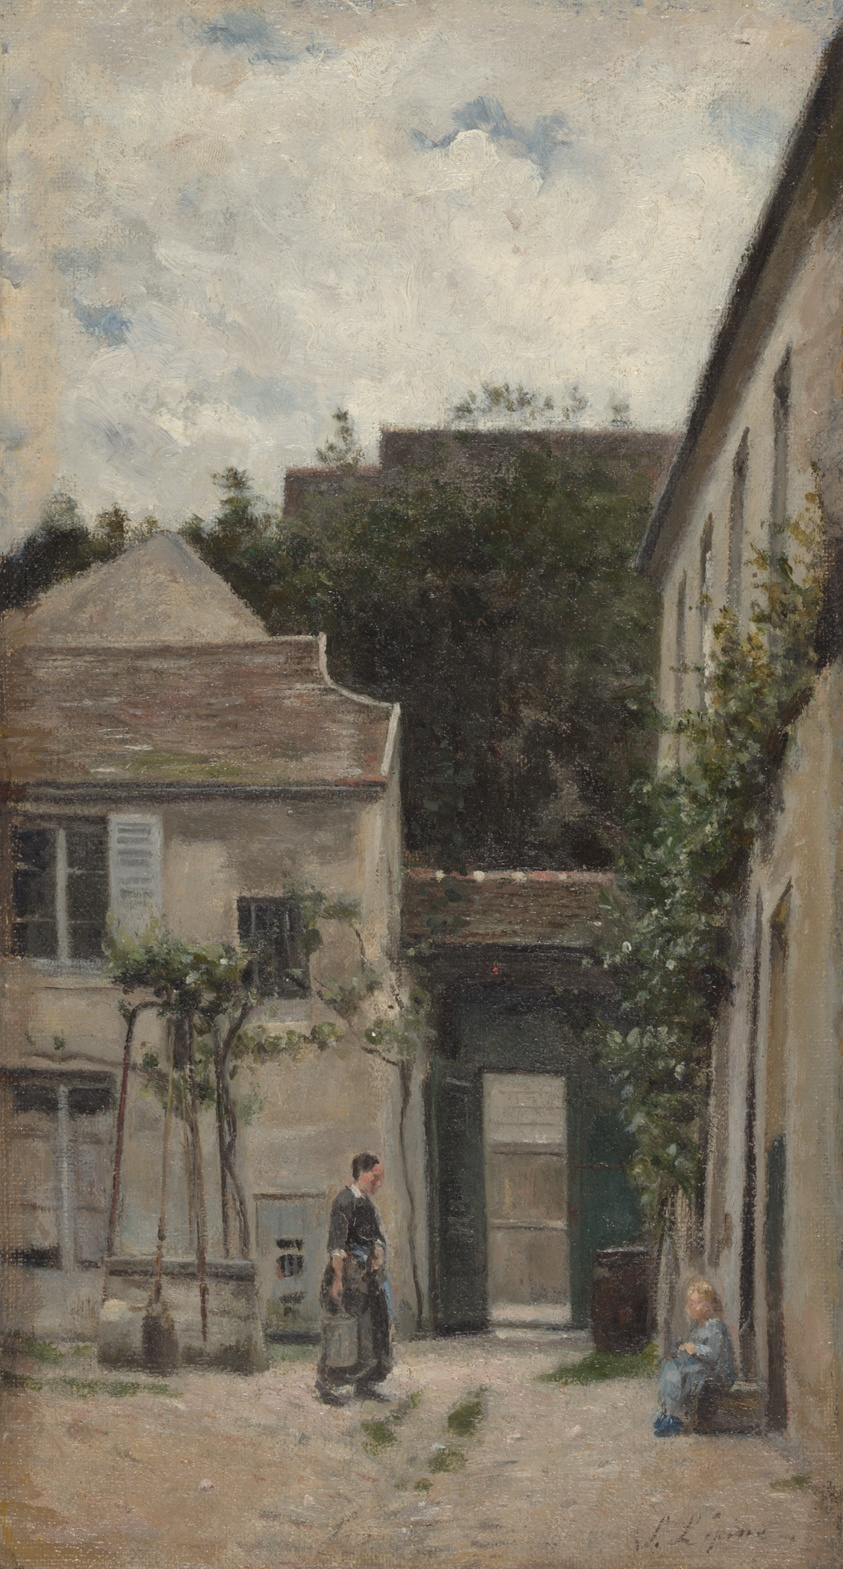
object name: Painting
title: The Courtyard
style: nineteenth century, 19th century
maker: Stanislas Lépine (French, 1835–1892)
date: c. 1880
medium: Oil on canvas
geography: France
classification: painting; french; oil on canvas; oil paintings (visual works); paint; european painting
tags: courtyard, work, labor, building, buildings, children, clouds, doorway, foliage, vines, window, woman, woman with children